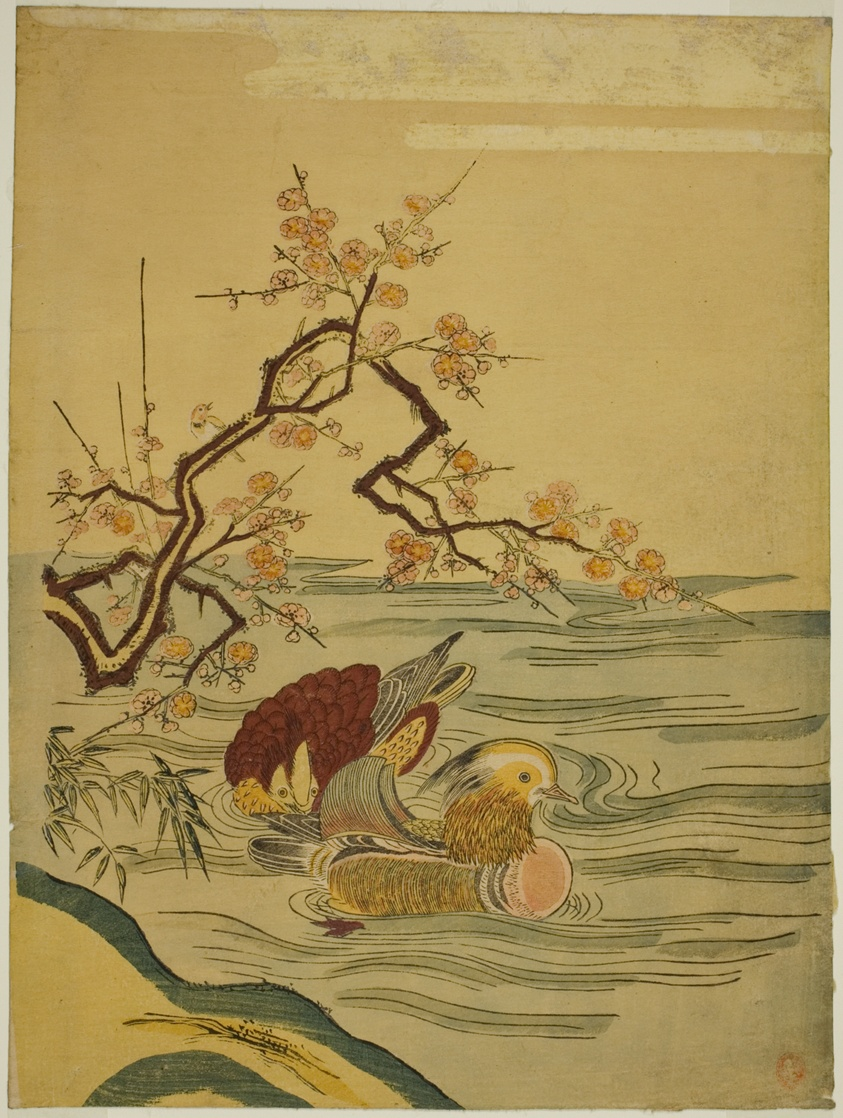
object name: Print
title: Mandarin Ducks Swimming under Plum Branch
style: Japanese (culture or style)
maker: Attributed to Isoda Koryusai; Japanese, 1735-1790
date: c. 1764/75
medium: Color woodblock print; chuban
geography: Japan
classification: woodblock print; print; asian art